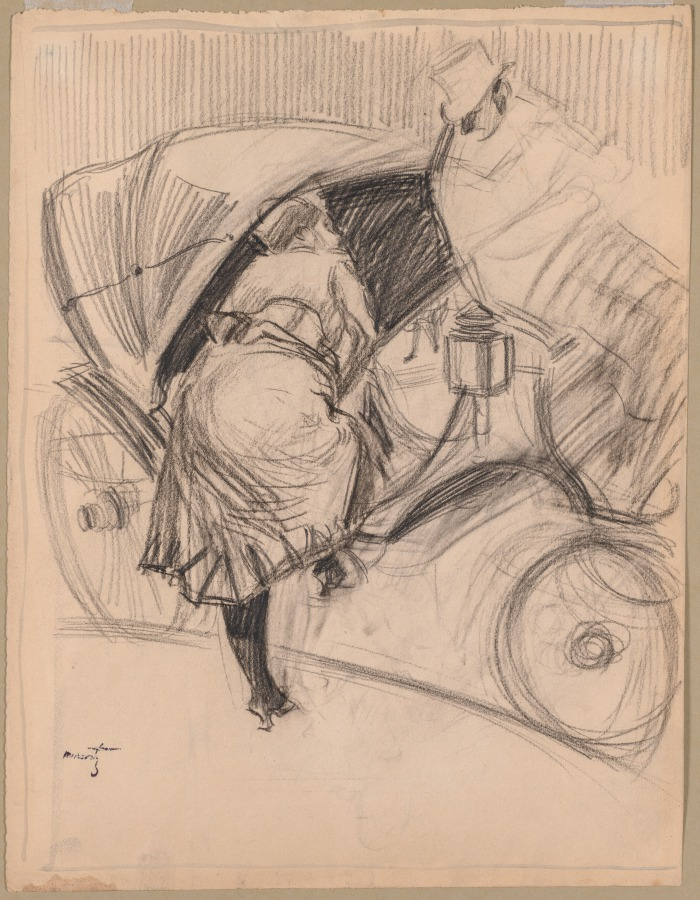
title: Woman Entering a Fiacre (recto); Right Profile of Man Wearing Tall Hat (verso)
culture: France, 19th century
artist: attributed to Jean Louis Forain (French, 1852–1931)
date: probably late 1800s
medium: Charcoal with black ink framing lines (recto); charcoal (verso)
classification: Drawing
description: One side of this double-sided image captures the bustling activity of urban Paris in the late 1800s. A fashionable woman climbs into a fiacre—a four-wheeled carriage—from the street curb. Her driver, seated at front, watches as she enters. The artist’s loose, sketchy rendering of the charcoal further emphasizes the sensation of busy city life evoked in this drawing.